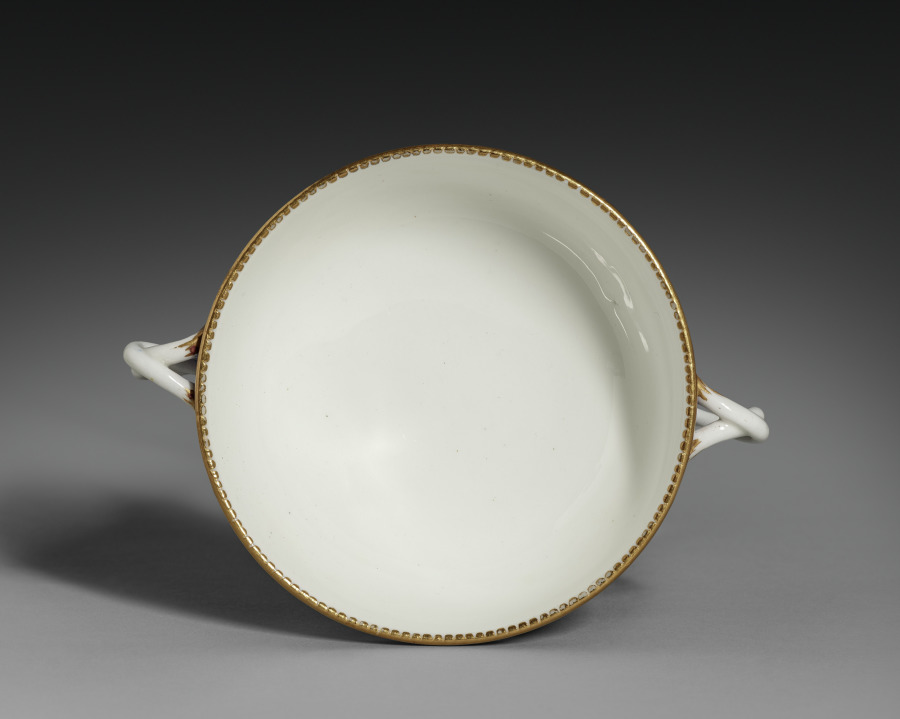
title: Broth Bowl (Écuelle Ronde)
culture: France, Sèvres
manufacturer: Sèvres Porcelain Factory (French, est. 1756)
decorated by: François-Joseph Aloncle (French)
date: 1772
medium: soft-paste porcelain with enamel and gilt decoration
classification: Ceramic